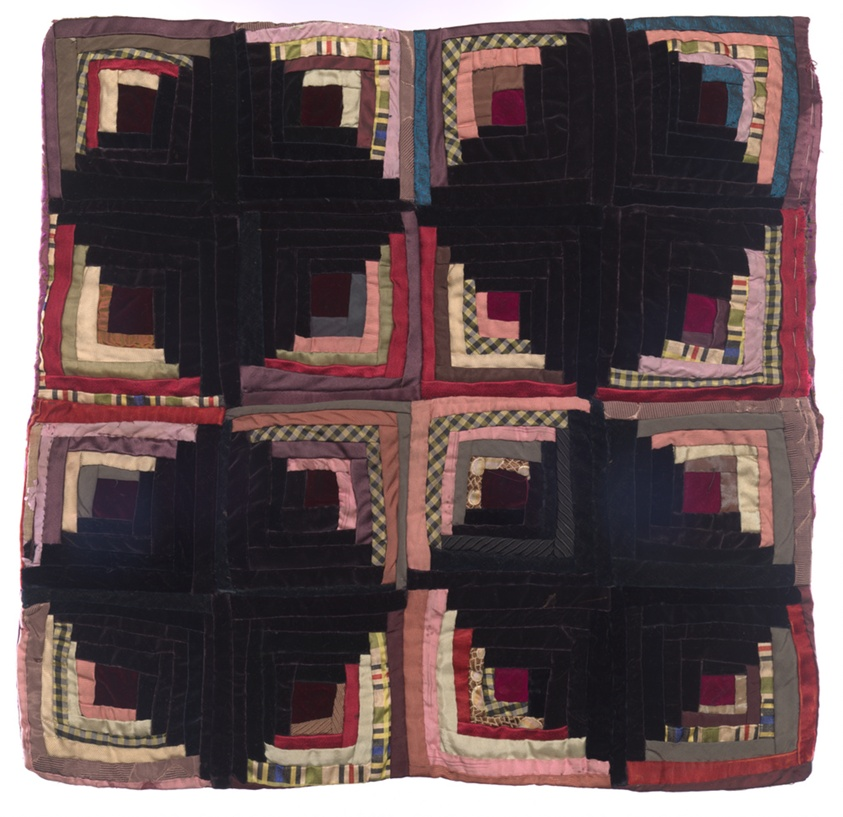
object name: Textile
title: Fragment (from a Bedcover)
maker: United States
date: 1875/1900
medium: Silk, plain, twill, and satin weaves, some with supplementary patterning warps or wefts, some self-patterned, and some with cut solid velvet; pieced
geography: United States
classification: textile; needlework - quilt